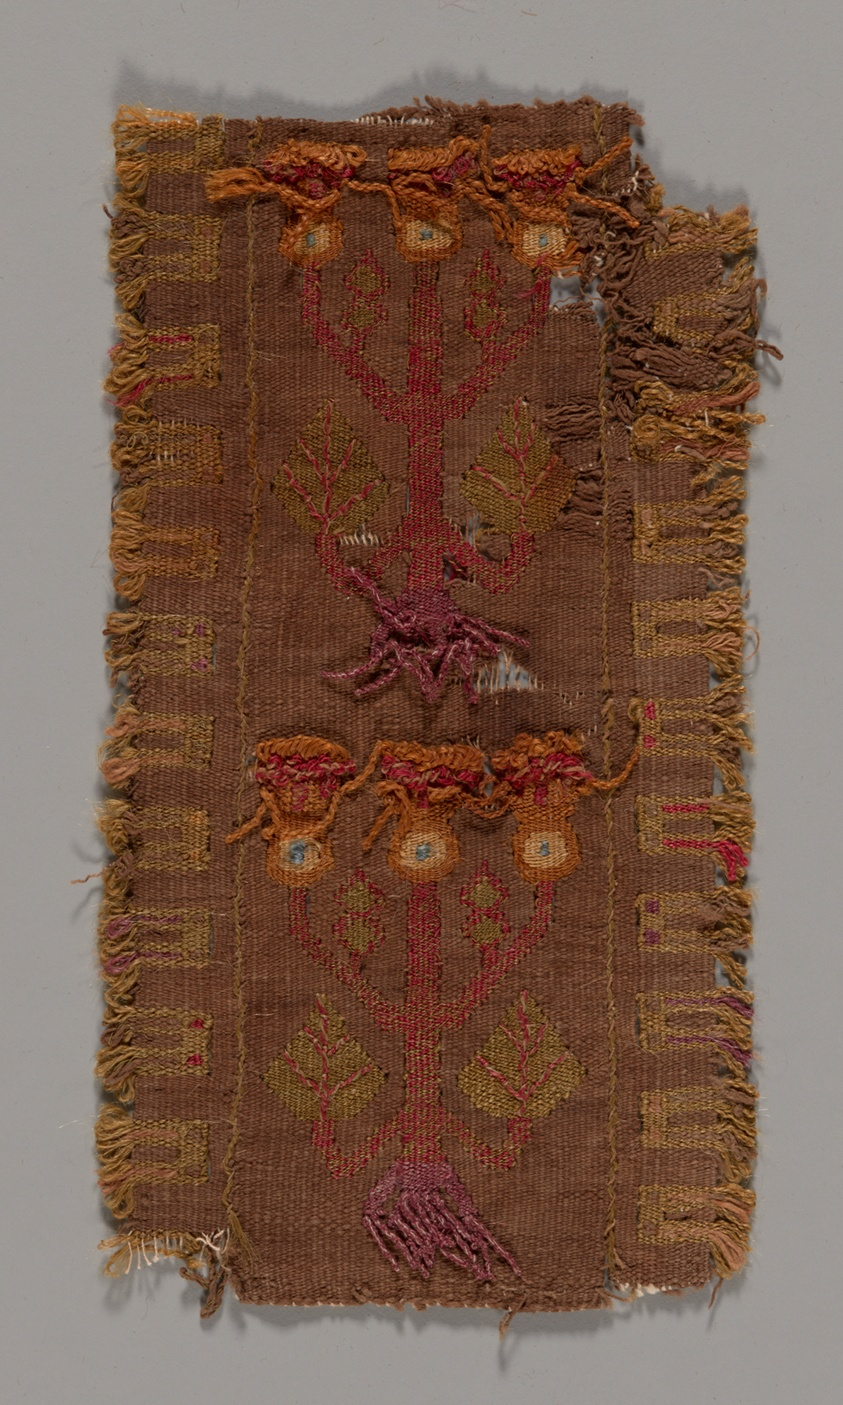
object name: Textile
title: Band Fragments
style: lambayeque, Pre-Columbian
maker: Lambayeque (North coast, Peru)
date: 1000/1476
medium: Cotton and wool (camelid), slit tapestry weave with eccentric wefts, uncut weft loop pile, extended uncut looped and plied weft fringes; embroidered with cotton and wool (camelid) with laid-in couching; and selvage weft loop fringe; three segments joined by overcast couching stitch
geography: Peru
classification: textile; weaving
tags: super/natural